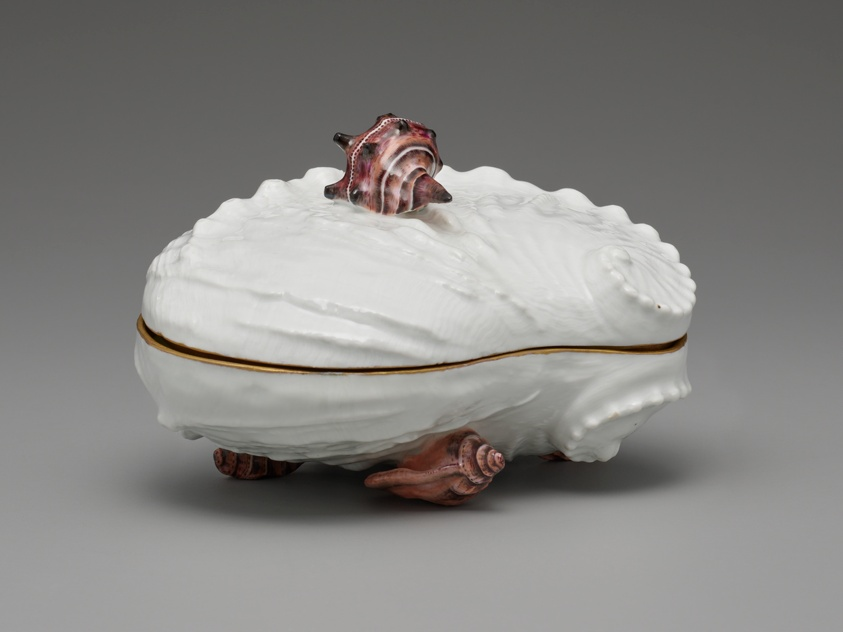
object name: Ceramics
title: Sweetmeat Box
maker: Meissen Porcelain Factory (German, founded 1710); Modeled by J. F. Eberlein (German, 1696-1749)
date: 1746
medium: Hard-paste porcelain, polychrome enamels, and gilt metal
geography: Meissen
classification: porcelain; box; ceramics; enamel; european decorative arts; metal; vessel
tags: shells, seas